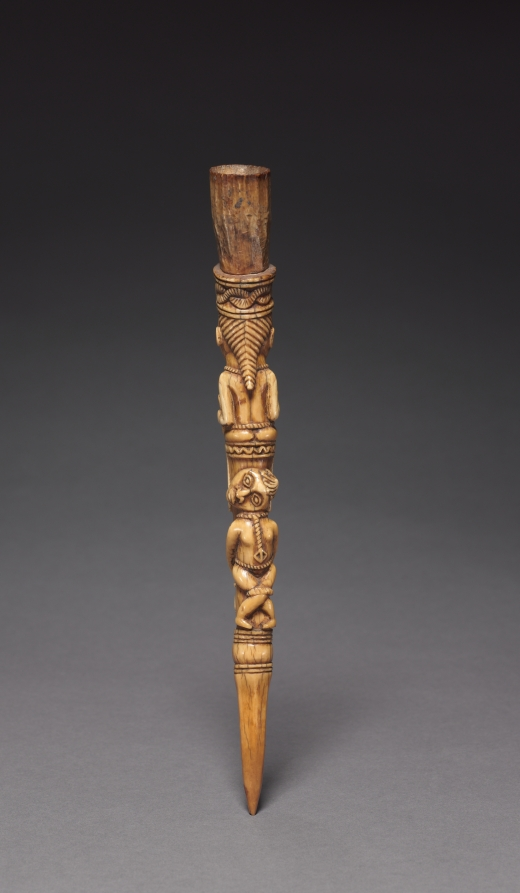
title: Scepter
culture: Africa, Central Africa, Democratic Republic of Congo (most likely), Cabinda, or Republic of Congo, probably Kongo-style (Yombe sub-group) carver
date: late 1800s–early 1900s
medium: ivory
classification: Implements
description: Used by male chiefs, ivory scepters were symbols of status indicating worldly authority and supernatural influence. The use of ivory implies that the chief has the fatal power of an elephant. The figurine shows a chief enthroned on the bound body of a criminal destined for such a death. A medicine package would have been enclosed within the container extending from the figure’s head, bestowing supernatural powers.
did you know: Scepters often represent the chief sitting atop a bound prisoner or attribute to a violent death.